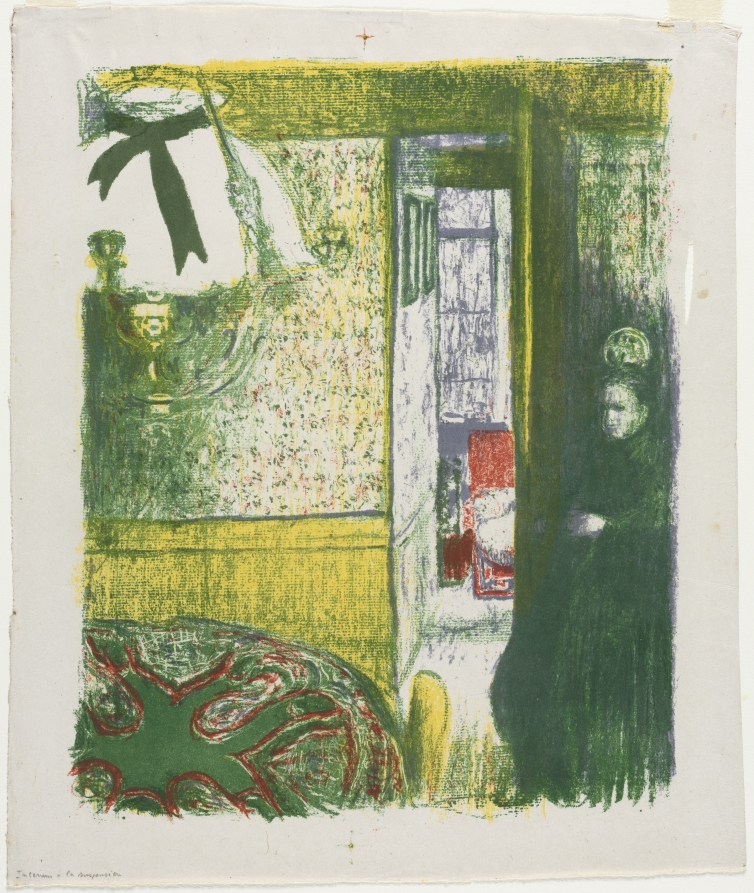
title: Interior with a Hanging Lamp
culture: France, 19th century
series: Landscapes and Interiors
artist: Édouard Vuillard (French, 1868–1940)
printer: Auguste Clot (French, 1858–1936)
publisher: Ambroise Vollard (French, 1867–1939)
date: 1899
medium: color lithograph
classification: Print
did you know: Vuillard lived with and drew artistic inspiration from his widowed mother, a seamstress, until her death in 1928.